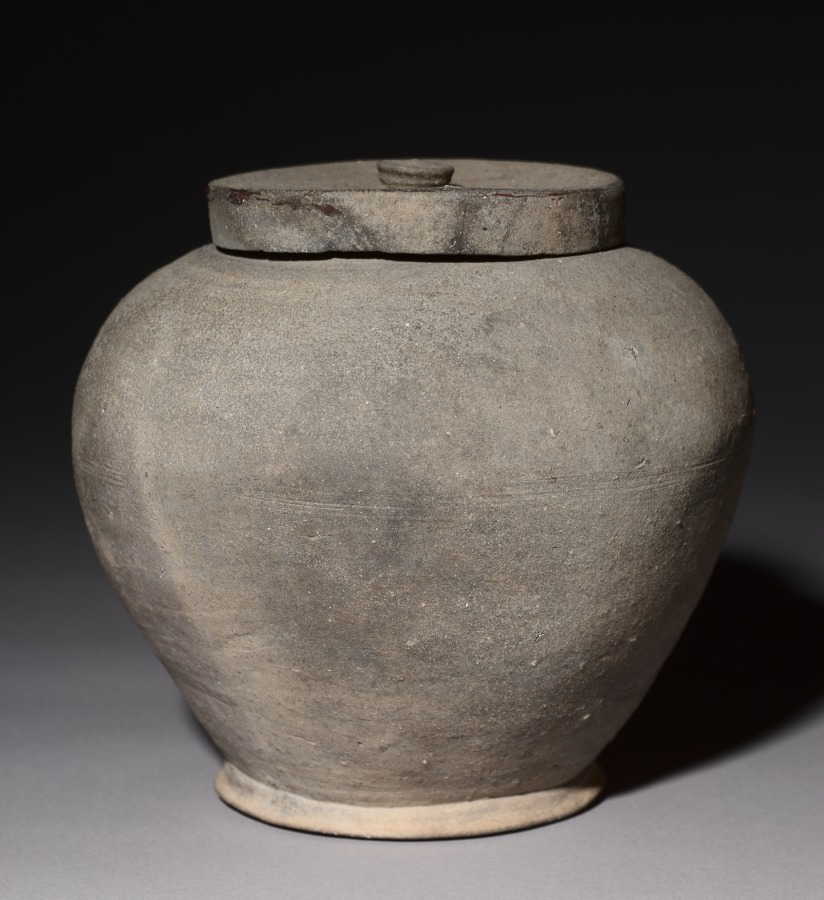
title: Cinerary Urn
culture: Japan, Heian period (794–1185)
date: c. 800–850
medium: stoneware with slight natural ash glaze (Sue ware)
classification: Ceramic